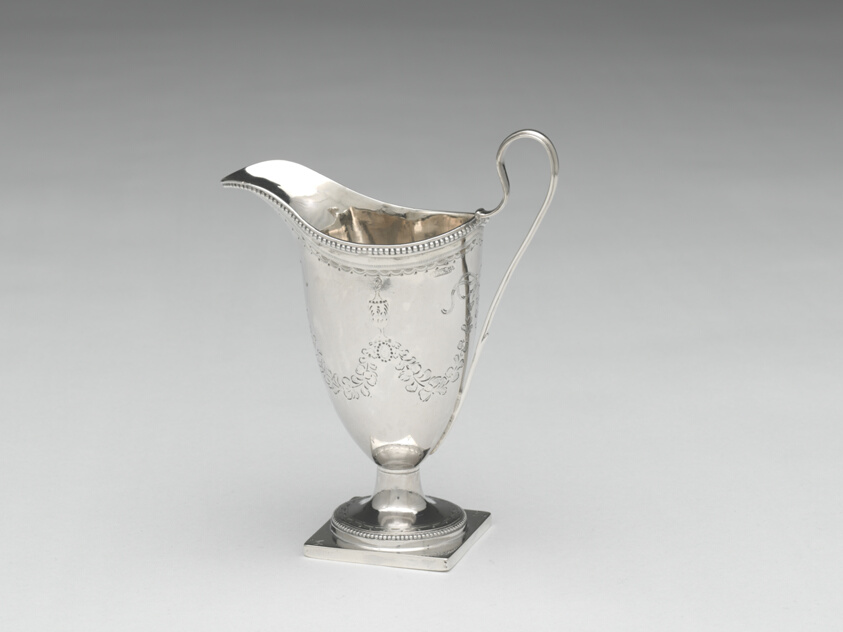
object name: Metalwork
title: Milk Pot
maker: Paul Revere Jr.; American, 1734–1818; Boston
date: 1784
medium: Silver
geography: Boston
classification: creamer; silver; american decorative arts; american arts; decorative arts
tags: dining, drinking